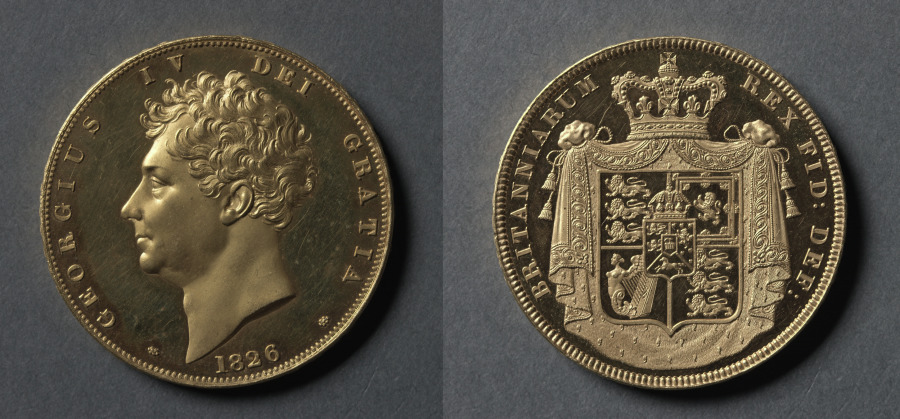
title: Five Pound Piece: George IV (obverse); Shield of Arms (reverse)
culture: England, George IV, 1820-1830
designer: Jean Baptiste Merlen (French, 1769–1850)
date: 1826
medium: gold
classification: Coins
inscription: DEI GRATIA * 1826 * GEORGIUS IV.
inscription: BRITANNIARUM.REX FID: DEF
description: Only pattern five-pound pieces were struck during the reign of George IV, none being put into circulation. In this reign, specimen proof sets appeared for the first time in 1823, and the pattern five- and two-pound pieces as well as the pattern silver crown were included in the sets.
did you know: The shield is quartered with the arms of England (1 & 4), Scotland (2), and Ireland (3) with the crowned arms of the Duchy of Brunswick and Lüneburg at the center.